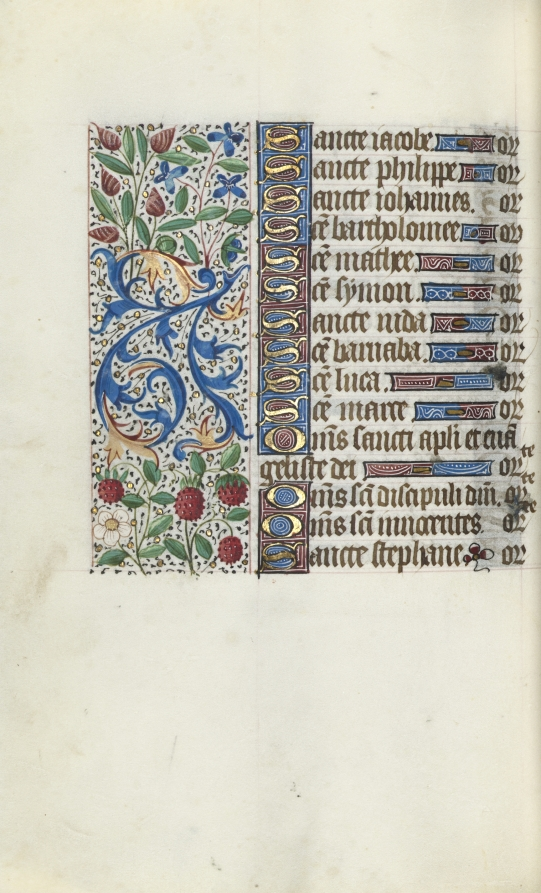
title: Book of Hours (Use of Rouen): fol. 93v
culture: France, Rouen, 15th century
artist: Master of the Geneva Latini (French, active Rouen, 1460–80)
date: c. 1470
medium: ink, tempera, and gold on vellum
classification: Bound Volume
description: In the late 1400s and early 1500s Rouen was an established and important center of book production. The city’s cathedral had a wealthy chapter that spent large sums of money to commission books and to maintain its extensive library. The stationers and booksellers would have likely been concentrated in or near the cathedral precinct. This artist, named after a manuscript now in Geneva, was Rouen’s principal illuminator during the second half of the 1400s.